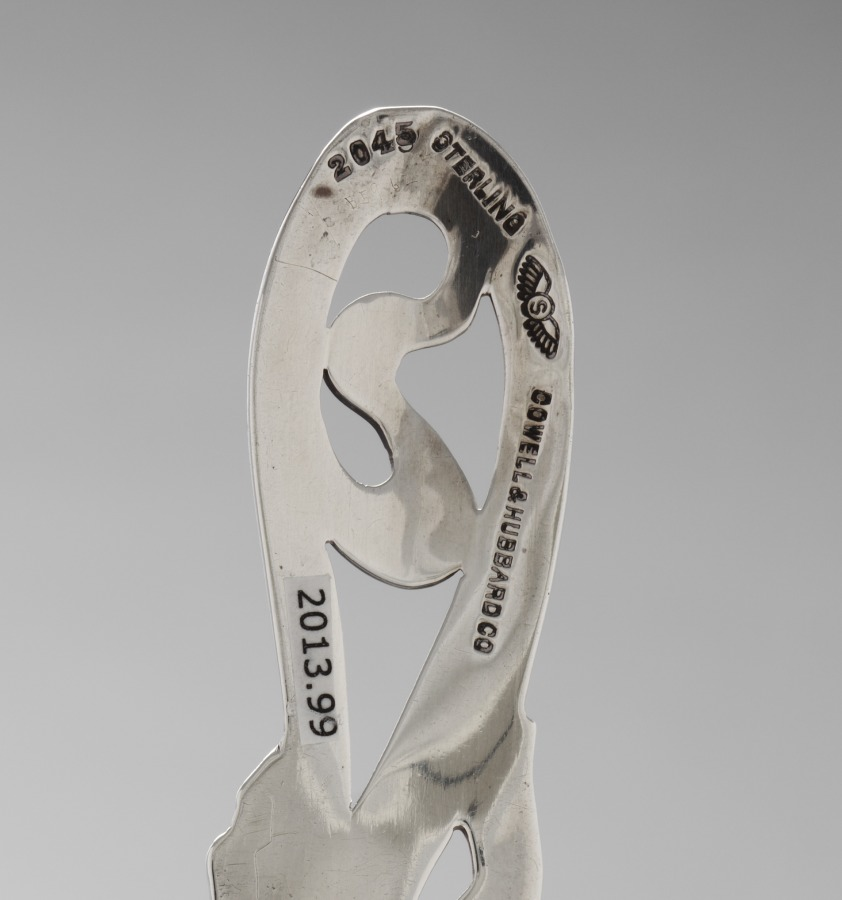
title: Paper Knife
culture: America, late 19th-early 20th century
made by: George W. Shiebler & Co. (American)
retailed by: Cowell and Hubbard Co. (American, Cleveland, 1879–1981)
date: c. 1900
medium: silver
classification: Metalwork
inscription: signed on reverse: 2045/Sterling/mark for Shiebler of wings flanking "S" in center for George Shiebler & Co., New York, New York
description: During the 1890s a new style emerged that reflected naturalistic and symbolic motifs found in Japanese and other Asian design. This movement rejected the historicism that had dominated architecture and design during the previous decades and took hold across Europe and America too. In France the style was known as "Art Nouveau," after the name of the gallery belonging to its chief proponent Siegfried Bing, the Maison de L'Art Nouveau (House of the New Art). This paper knife by the American silver company George W. Shiebler & Co. typifies Art Nouveau style with its flowing lines enveloping a young woman, revered as the ideal natural beauty. The composition resolves into a pointed dagger, suggesting a tragic end to life itself. Art Nouveau reached its apex at the 1900 world's fair in Paris, which was intended to herald the new century with a new style of art. However, critics and consumers alike soon rejected Art Nouveau as too sentimental in favor of newer motifs and styles as the moment passed. By 1905 it was all but forgotten.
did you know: This expressive Art Nouveau paper knife, or letter opener, was sold by the Cleveland jeweler Cowell and Hubbard around 1900.